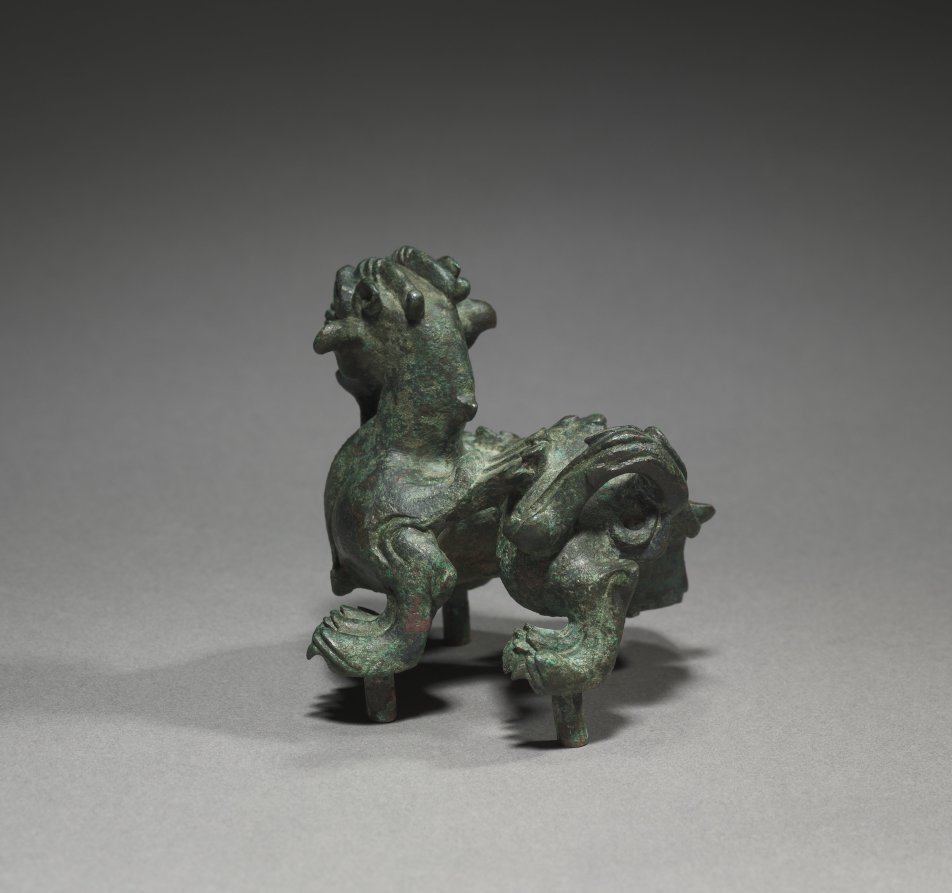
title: Winged Chimera (Bixie)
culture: China, Southern and Northern Dynasties period (386–589 CE)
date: 400s CE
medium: bronze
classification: Sculpture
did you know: A bixie is a fantastical hybrid creature that was believed to ward off evil spirits